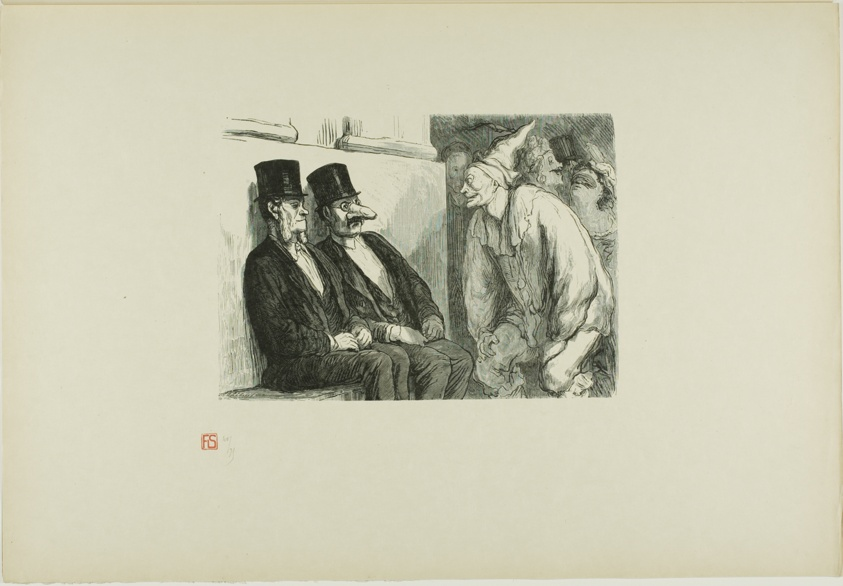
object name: Print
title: The Opera Ball: You are having too much fun!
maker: Etienne (French, 19th century); after Honoré Victorin Daumier (French, 1808-1879); printed by François Louis Schmied (Swiss, 1873-1941); published by Jules Meynial (French, 20th century)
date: 1868, printed 1920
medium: Wood engraving on cream Japanese paper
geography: France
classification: wood engraving; print; prints and drawing